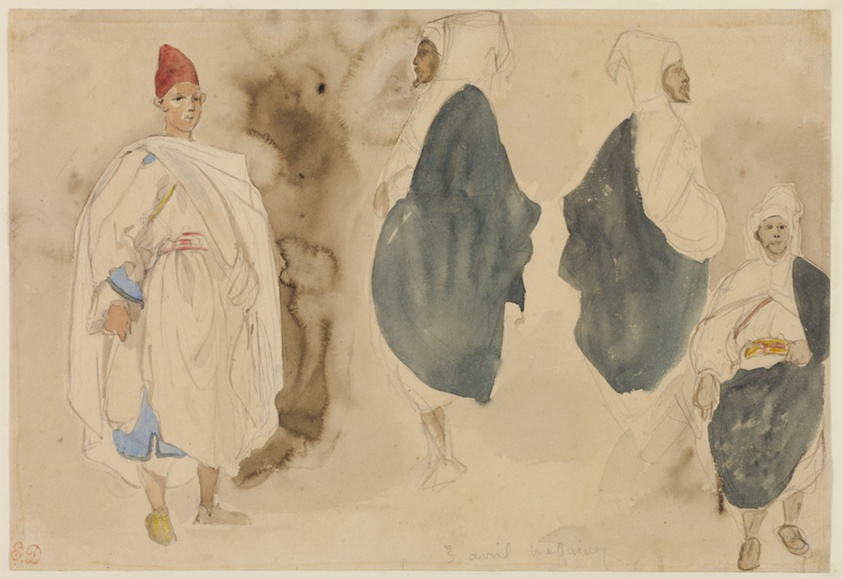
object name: Drawing and Watercolor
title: Four Sketches of Arab Men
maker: Eugène Delacroix (French, 1798-1863)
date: 1832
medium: Watercolor and graphite, on tan wove paper, tipped onto cream board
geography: France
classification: watercolor; drawings (visual works); prints and drawing